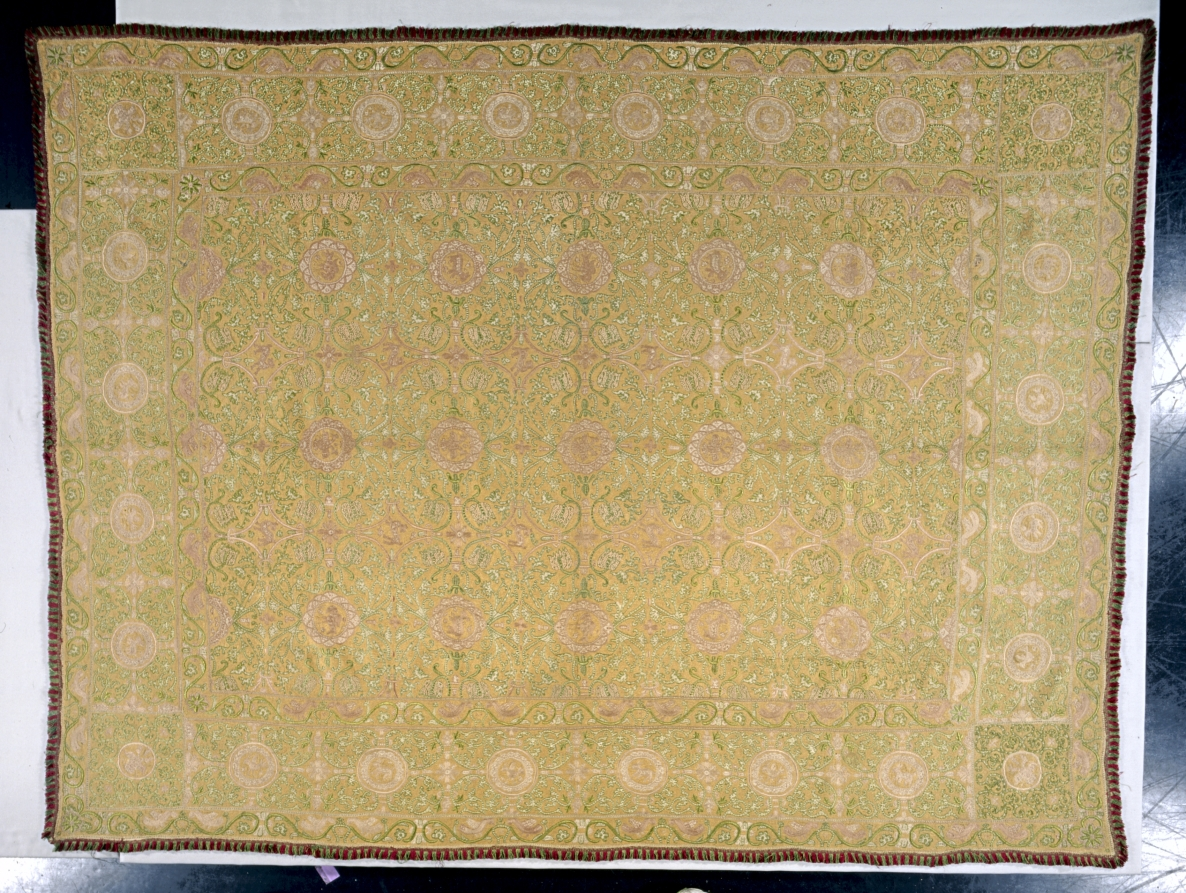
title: Embroidered Bedspread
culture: Portugal, 17th-18th century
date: 17th-18th century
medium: embroidery; silk on linen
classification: Embroidery